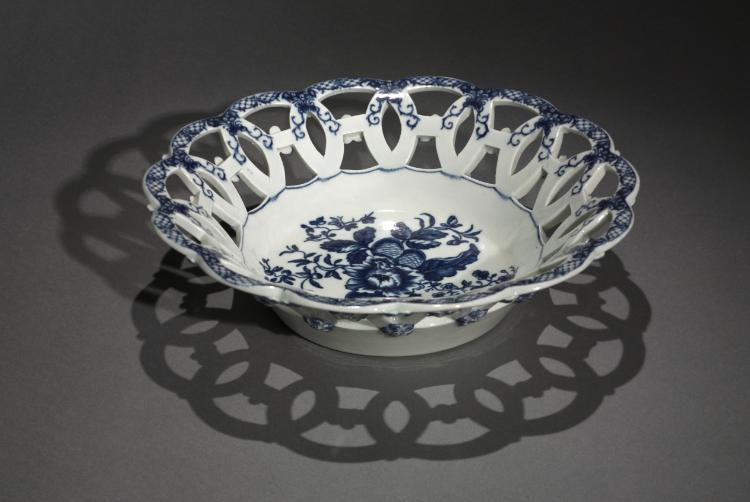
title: Fruit Bowl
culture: England, Worcester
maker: Worcester Porcelain Factory (British, established 1751)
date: c. 1750–70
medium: porcelain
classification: Ceramic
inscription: Blue half moon mark on bottom